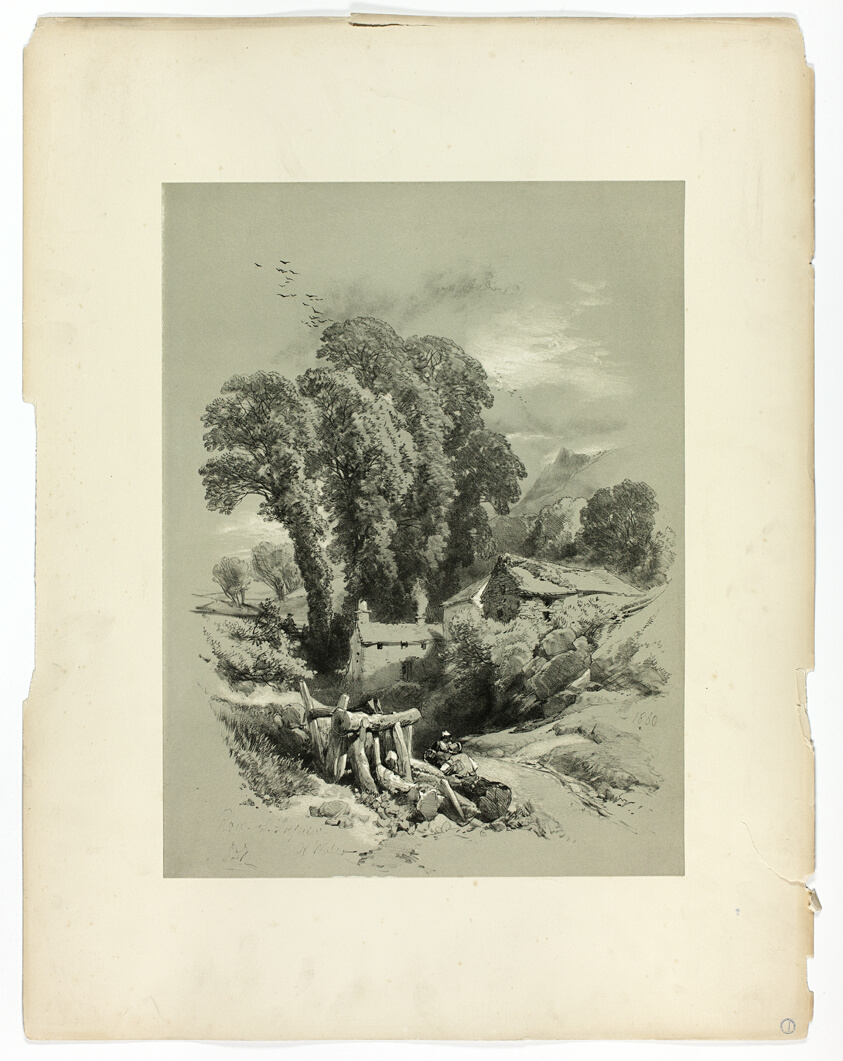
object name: Print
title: Row W. Trefriw, Wales, from Picturesque Selections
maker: James Duffield Harding, (English, 1798-1863); Published by W. Kent and Co.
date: c. 1860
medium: Lithograph on paper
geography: England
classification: lithograph; print; prints and drawing